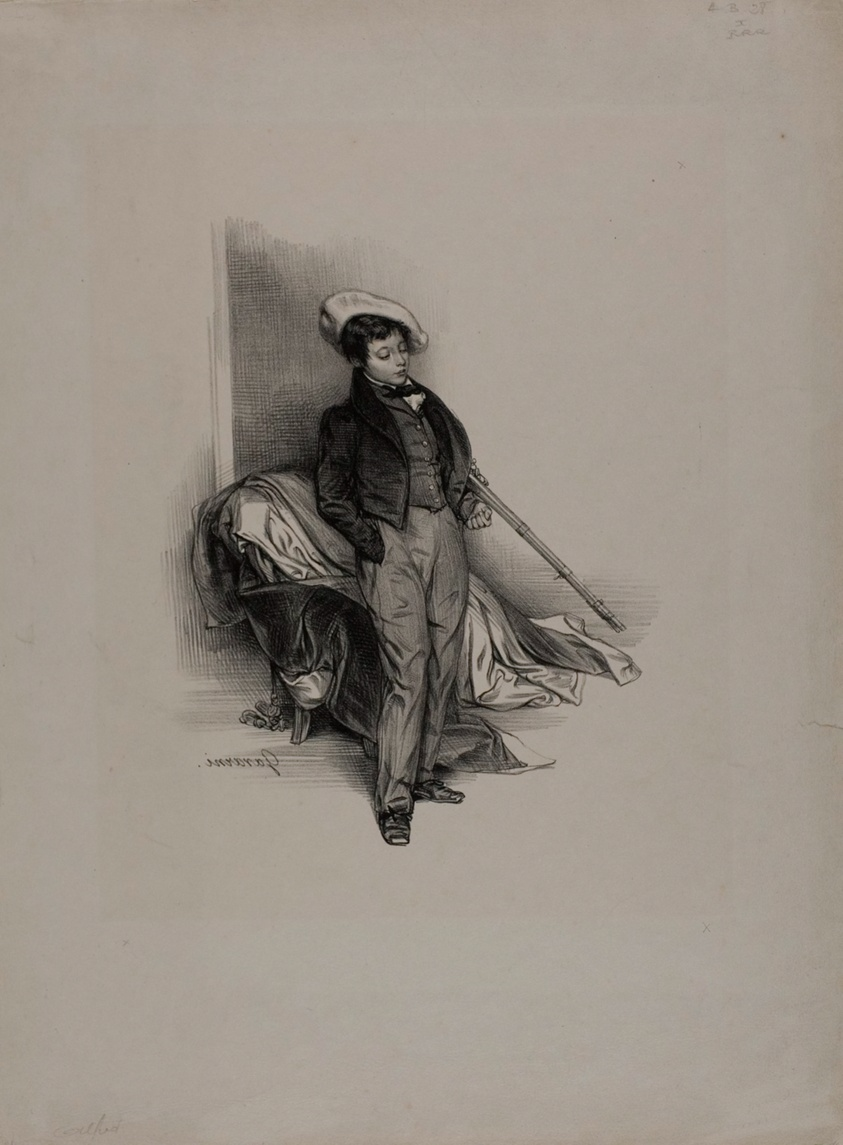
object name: Print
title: Alfred Feydeau, from Etudes d'enfants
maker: Paul Gavarni (French, 1804-1866)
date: 1833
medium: Lithograph in black on ivory wove paper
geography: France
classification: lithograph; print; prints and drawing